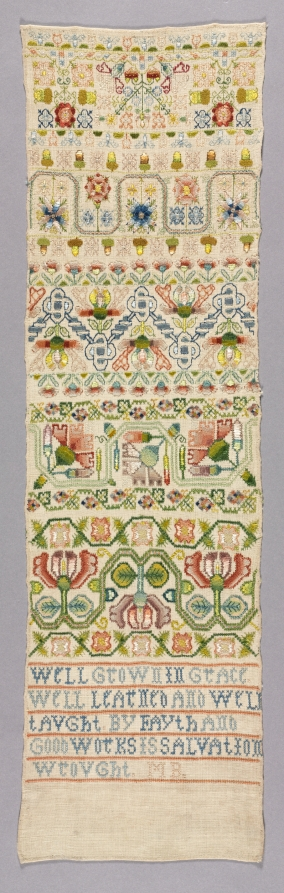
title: Long Sampler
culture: England, 17th century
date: c. 1650–70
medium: embroidery: silk on linen tabby ground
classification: Sampler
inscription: below: "WELL GROWN IN GRACE/ WELL LEARNED AND WELL/ TAUGHT BY FAYTH AND/ GOOD WORKS IS SALVATION/ WROUGHT. M B."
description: Samplers were created as a mark of achievement in needlework by young ladies as they progressed in their education. Because they display levels of skill and technique, samplers often include figurative or scenic decoration along with the alphabet and various horizontal and vertical patterns that could serve as guides for future stitching. Most samplers reveal the pride of a young lady as she showed off her considerable accomplishment in sewing and were treasured from generation to generation.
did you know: Long samplers from England in the 1600s often reproduced or adapted designs from earlier pattern books for needlework.